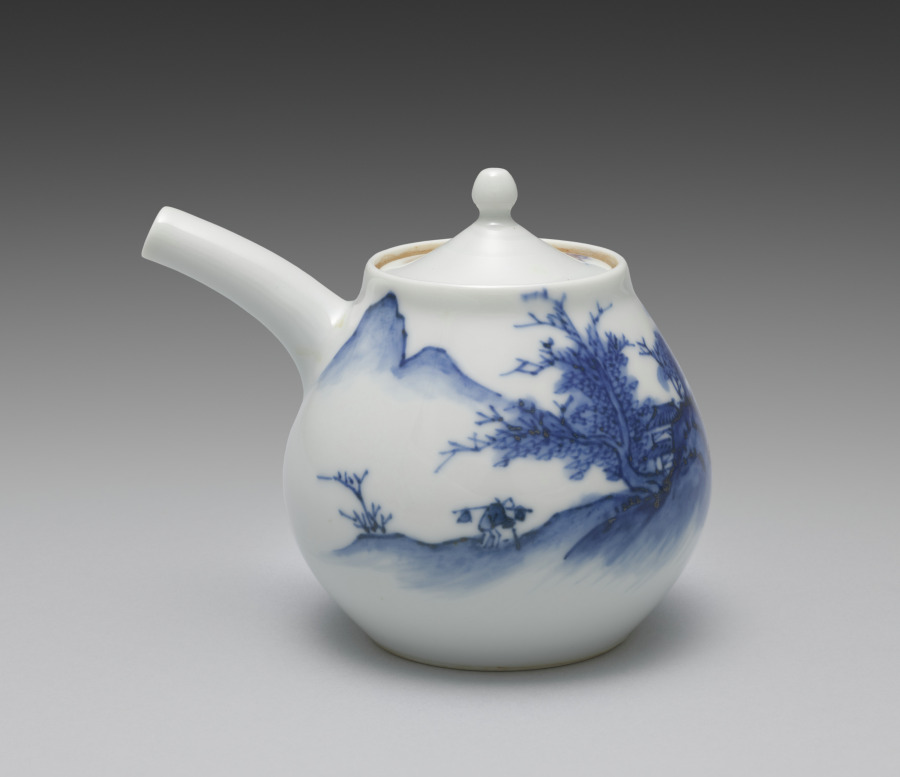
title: Teapot from Tea Set with Chinese Landscape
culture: Japan, Meiji period (1868–1912)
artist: Seifū Yohei III (Japanese, 1851–1914)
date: 1893–1914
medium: Porcelain with underglaze blue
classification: Ceramic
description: This tea set with idyllic lakeside Chinese landscapes has a side-handled pot called a kyūsu, used for steeping, straining, and serving tea. Unlike some others, this set also has a yuzamashi, a container used to cool boiled water to just the right temperature for the best flavor when steeping. Seifū Yohei III’s painting teacher, Tanomura Chokunyū (1814–1907), made a visual record of famous sencha events that shows how these kinds of porcelains fit with objects such as a stove and kettle to form a complete set of utensils for tea preparation, and with ensembles of decorative objects meant to inspire creativity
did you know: The teapot depicts two friends playing a board game on a promontory beyond a two-storied residence, while another figure comes across the entry bridge bearing bags of provisions, hung from the ends of a pole balanced across his shoulders.